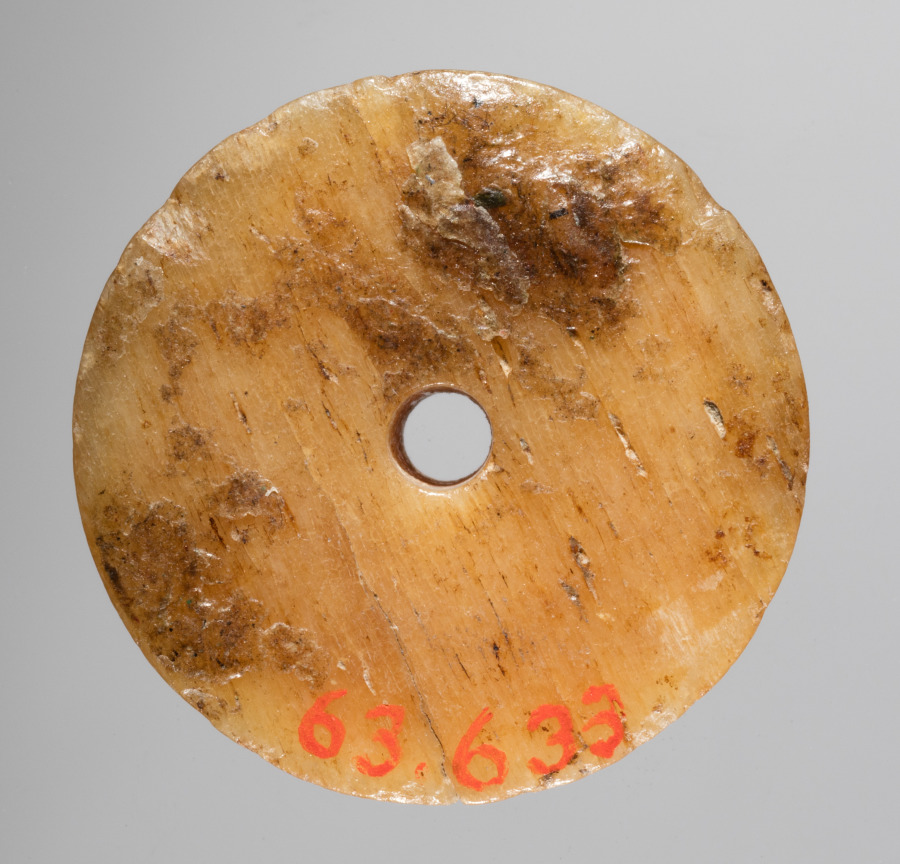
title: Spindle Whorl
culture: Iran, early Islamic period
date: 700s - 900s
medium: bone, incised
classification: Spindle Whorl